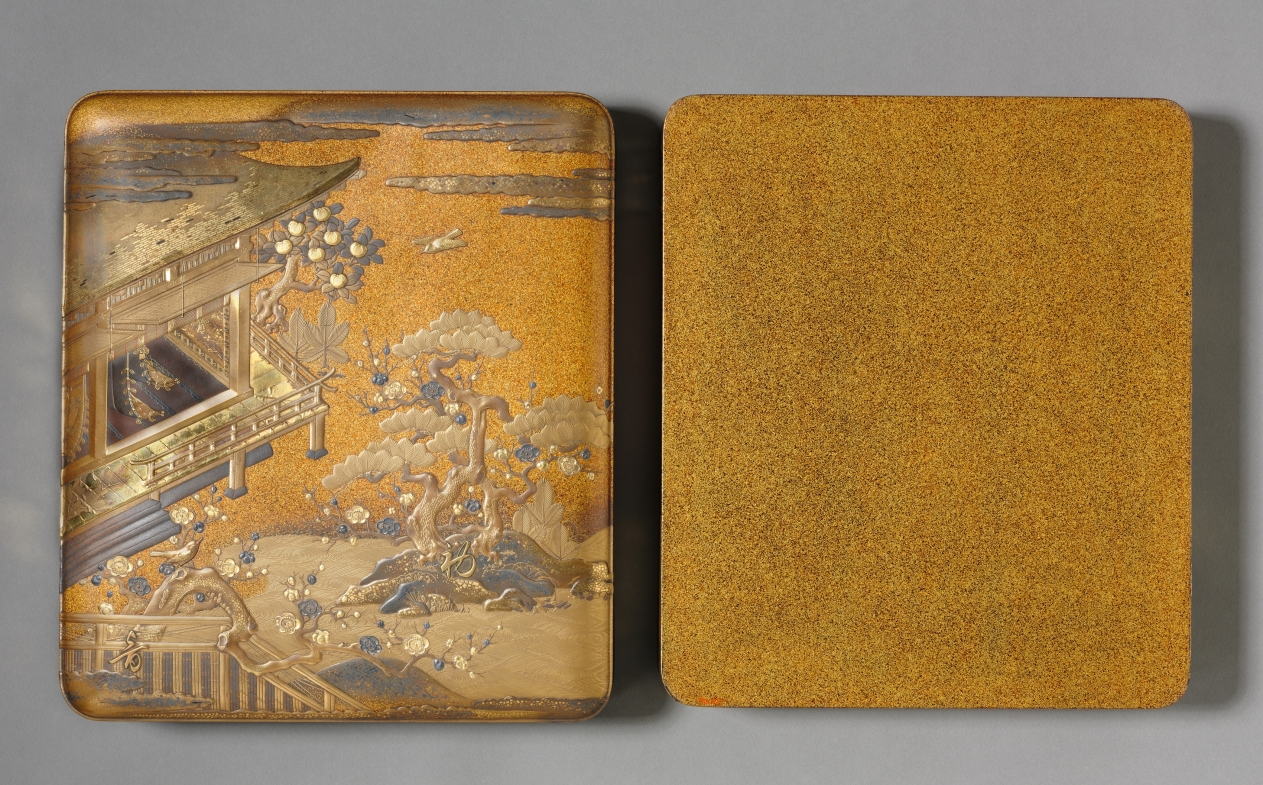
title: Writing Box (Suzuribako) with the “First Song” (Hatsune) Chapter from the Tale of Genji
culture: Japan, Meiji period (1868–1912)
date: early 1900s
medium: Lacquered wood with gold and silver sprinkled powder (maki-e), foil application (kirikane), and metal inlay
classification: Lacquer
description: The design of this box was inspired by an object in the 1639 lacquer wedding set of Chiyohime, the daughter of the shogun (ruler). Information about the set became available in the Meiji period, leading some lacquer artists to emulate its designs. This box features a scene from the chapter “First Song” (Hatsune) of the Tale of Genji, in which Prince Genji and his love Murasaki enjoy her garden. It incorporates the written characters for “first” (初, hatsu) and “sound” (音, ne), indicating the first song of the warbler in spring, associated with the new year—the water dropper for mixing the ink is in the shape of this bird.